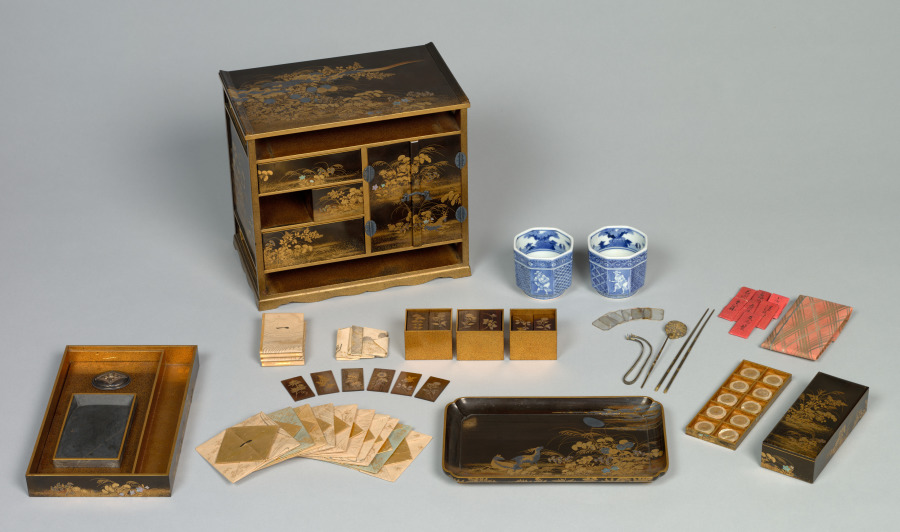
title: Ten-Round Incense Game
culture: Japan, Edo period (1615–1868)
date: 1700s–mid-1800s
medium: Lacquered wood with gold and silver sprinkled powder (maki-e) and mother-of-pearl inlay, metal fittings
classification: Lacquer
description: A popular pastime in the Edo period was a game in which a group of players passed around incense and guessed its name or scent. Small pieces of incense would be placed on thin mica plates and heated over hot ash, releasing their aroma for the players to smell. Players then cast their guesses with playing pieces. The game master kept score with the writing set. This game is handsomely decorated with images of deer in an autumn setting.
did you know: The blue and white porcelain containers in which the heated incense was passed feature designs of foreigners.